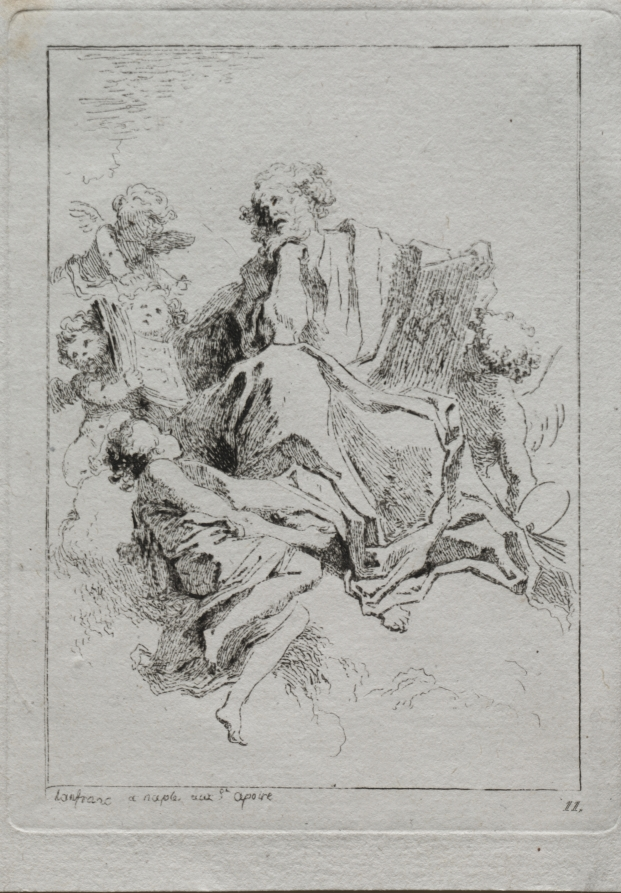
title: Saint Luke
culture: France, 18th century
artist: Jean-Honoré Fragonard (French, 1732–1806)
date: c. 1764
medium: etching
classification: Print